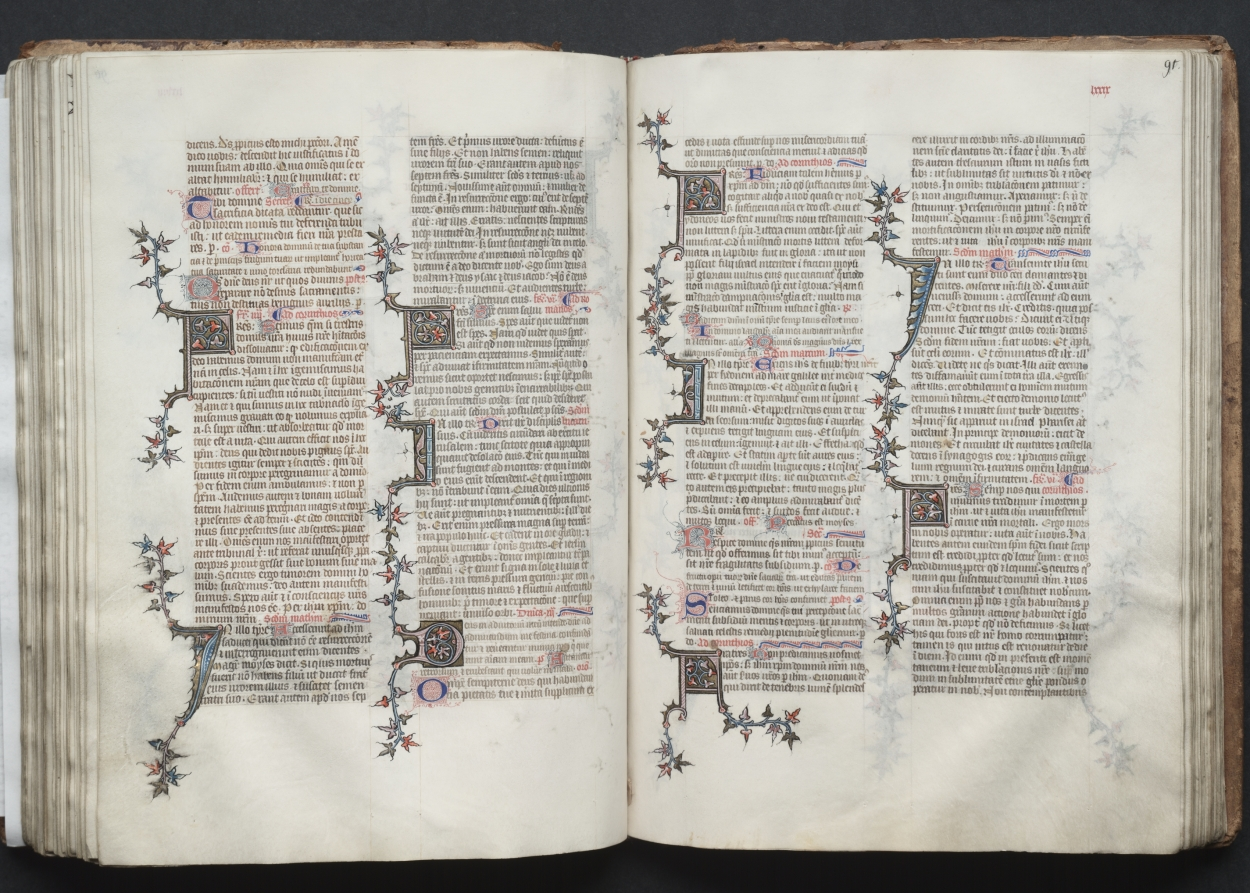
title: The Gotha Missal: Fol. 90v, Text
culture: France, Paris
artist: Master of the Boqueteaux (French)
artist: and Workshop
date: c. 1375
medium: ink, tempera, and gold on vellum; blind-tooled leather binding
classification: Bound Volume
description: The style and quality of this manuscript's decoration is typical of deluxe Parisian books made for aristocratic or royal patrons. Most of the book's decoration appears to be the work of the Master of the Boqueteaux, an artist active at the court of King Charles V (died 1380). His style was apparently shared by a number of book illuminators working in and around Paris. It is very possible that the Gotha Missal belonged to Charles V, but is not provable because the manuscript has no royal portraits and lacks a colophon. Given the book's magnificent decoration, however, it would seem that it was produced for a Valois prince, if not for the king himself. The manuscript receives its name from the German dukes of Gotha, its later owners.